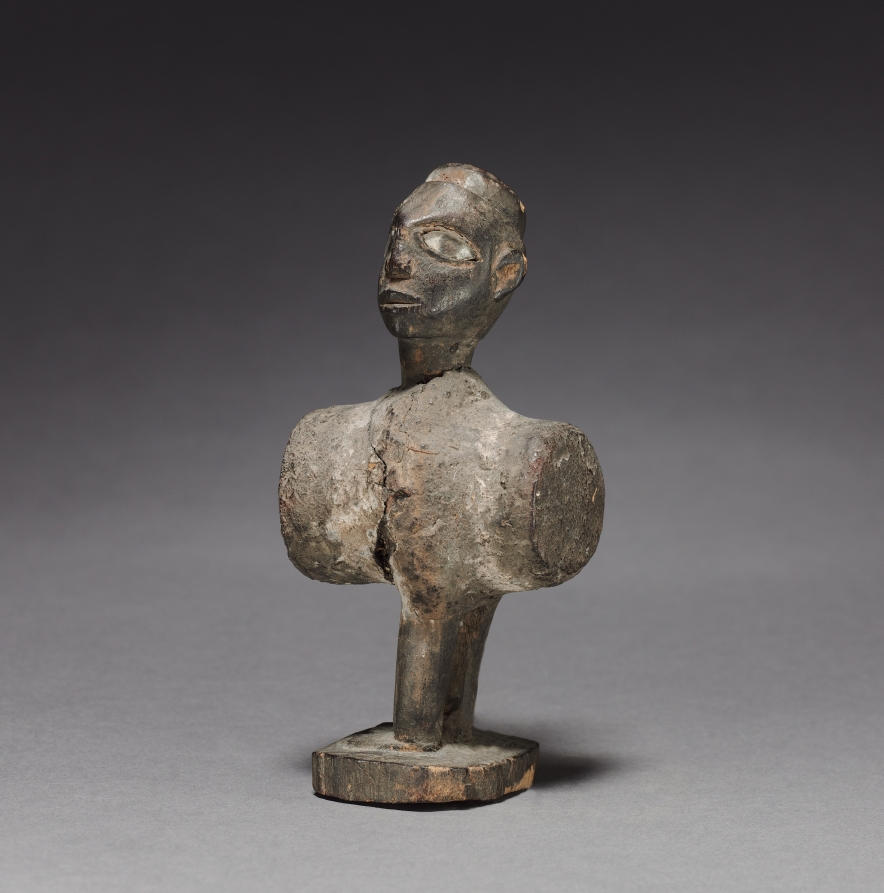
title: Power figure (nkisi)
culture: Africa, Central Africa, Republic of the Congo, Kongo-style maker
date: late 1800s-early 1900s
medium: Wood, organic materials (including resin), and metalized glass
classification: Sculpture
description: One of seven anthropomorphic figurines, these minkisi contained medicines in which an ancestral spirit was believed to reside. The medicines served a metaphorical rather than literal purpose in the resolution of conflicts among Kongo people. This figure contained white- and red-colored medicine loads on its belly and back. Its pose may refer to the nkisi’s capacity to see more than others.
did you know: The nduda minkisi were loaded with gunpowder and/or medicine to protect their owners and to shoot “witches” and other enemies.